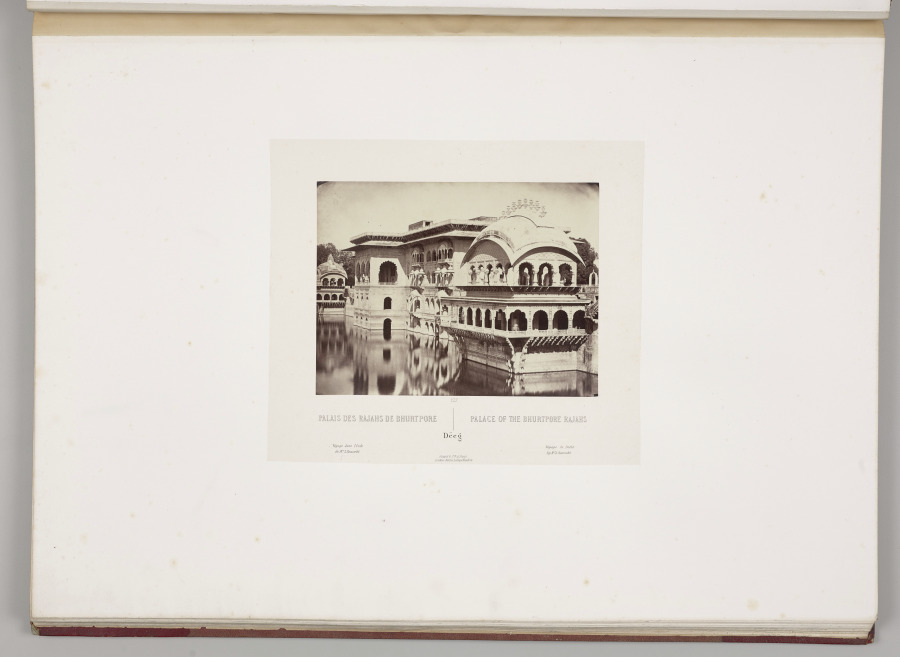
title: Palace of the Bhurtpore Rajahs, Dëeg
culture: France, 19th century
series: India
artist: Louis-Théophile Marie Rousselet (French, 1845–1929)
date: 1865–68, published 1869–70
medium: Albumen print from glass plate negative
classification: Photograph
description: Concerned that his drawings did not do justice to the splendor of India’s monuments, Rousselet learned photography in India that year, a remarkable accomplishment. He proved to be a talented photographer with a sophisticated sense of composition. The scenes in this volume sweep across sites of Sultanate, Rajput, and Mughal power in northern India, from the sacred Hindu city of Varanasi on the Ganges River to Alwar in Rajasthan. Also included are several scenes of industry and portraits of Indian rulers.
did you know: Louis Rousselet described himself as a “scientific traveler” when he went to India alone at age 18 in 1863 and stayed into 1868.